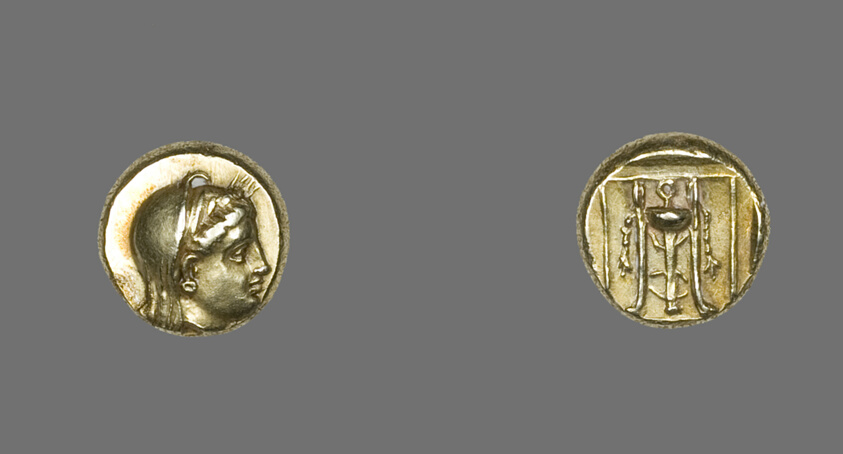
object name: Coin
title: Hecta (Coin) Depicting the Goddess Demeter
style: Classical, ancient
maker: Greek, minted in Lesbos, probably Mytilene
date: 400-350 BCE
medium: Electrum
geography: Greece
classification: coin; ancient art